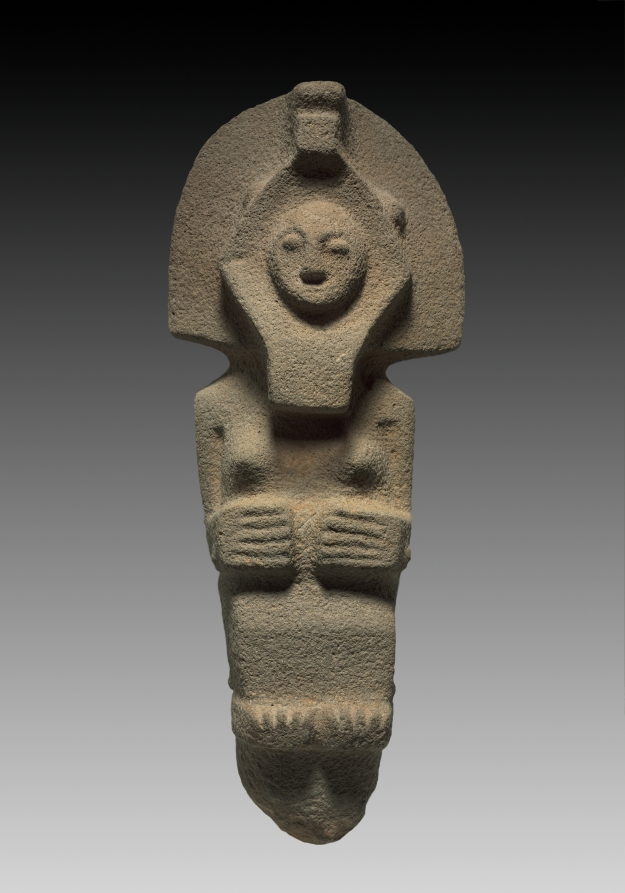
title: Standing Female Figure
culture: Mexico, Gulf Coast, Huastec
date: c. 1000–1500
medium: stone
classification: Sculpture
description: The female depicted in this sculpture wears a serpent-maw headdress—the female’s head appears within the jaws of the serpent, whose eyes can be seen on the “fan” of stone around the head. Many elite Mesoamerican people of the period are shown wearing similar headdresses, suggesting that such sculptures represent noble women. In the past, they have been interpreted as supernatural beings.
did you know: The position of the figure’s hands on her belly may suggest motherhood.